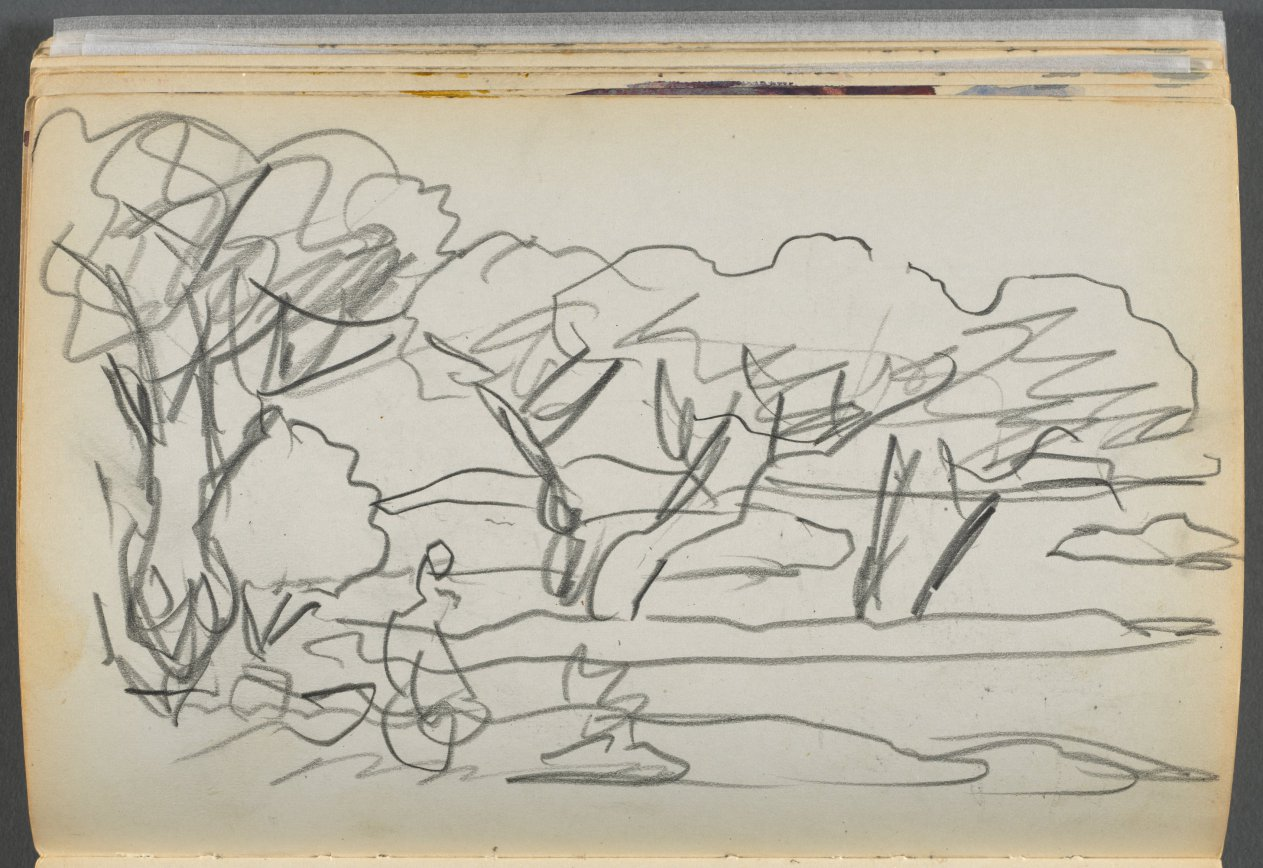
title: Sketchbook- The Granite Shore Hotel, Rockport, page 122: Trees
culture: America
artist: Maurice Prendergast (American, born Newfoundland [now Canada], 1858–1924)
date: 1905–10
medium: graphite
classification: Bound Volume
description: This sketchbook contains 72 pages of pencil drawings and 9 watercolors of Cape Ann. On the inside of the cover Prendergast wrote the address of the Granite Shore Hotel in Rockport, Massachusetts.